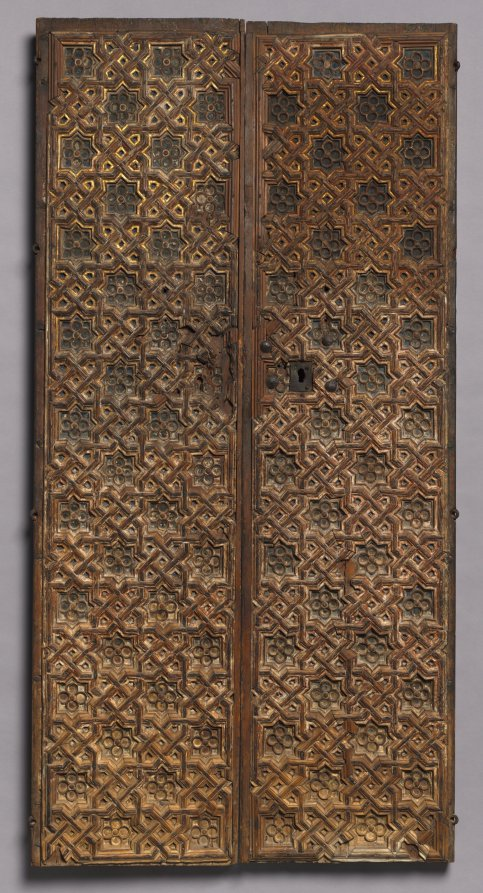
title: Pair of Doors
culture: Spain, early 15th century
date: early 1400s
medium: gilded and painted wood (pine)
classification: Furniture and woodwork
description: Typical of Muslim-inspired ornamentation, these doors reflect a love of geometric decoration stemming from a non-realistic artistic tradition. They consist of applied wood strips that form eight-point stars, flowers, and geometric interlace designs. Such designs are reflected in the tiles, ceramic vessels, and metalwork of Muslim-occupied Spain. The origin of the doors is not known, but they may have belonged to a palace or domestic residence. In 711, the Moors had invaded and conquered nearly the entire peninsula. During the next 750 years, independent Muslim states were established, and the entire area of Muslim control became known as Al-Andalus. Muslim philosophers and scientists developed knowledge in areas like medicine, optics, algebra, chemistry, and geometry, as seen here.